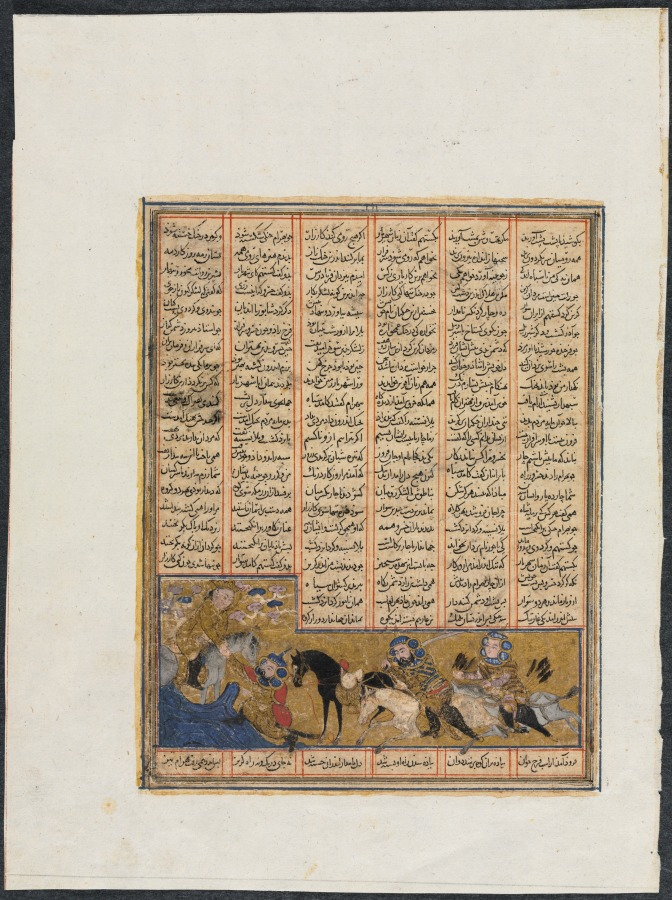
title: Episodes from the Reigns of Khusrau Parviz and Nushirwan from a Shahnama (Book of Kings) of Firdausi (940–1019 or 1025)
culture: Iraq, Baghdad, Ilkhanid period (1256-1353)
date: c. 1299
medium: opaque watercolor, ink, and gold on paper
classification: Manuscript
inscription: script: Naskh